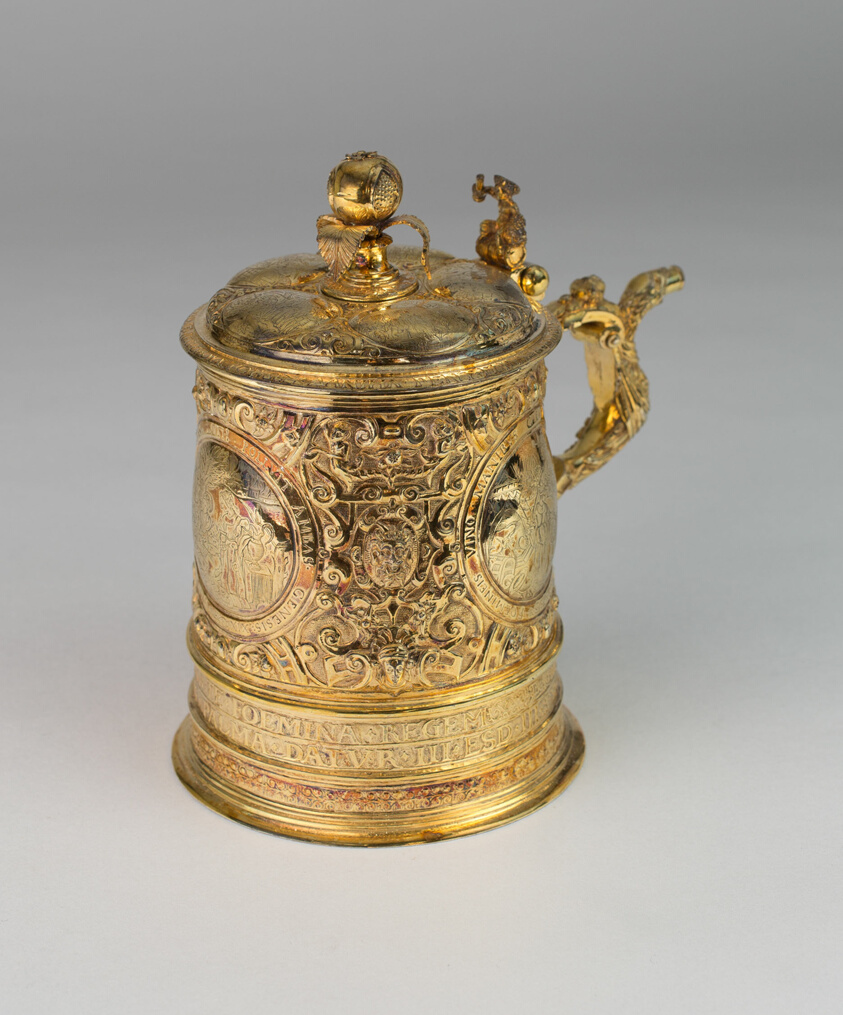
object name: Decorative Arts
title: Tankard with Biblical Scenes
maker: German, Passau or Ingolstadt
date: 1569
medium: Silver gilt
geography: Passau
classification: silver; metalwork; european decorative arts; decorative arts